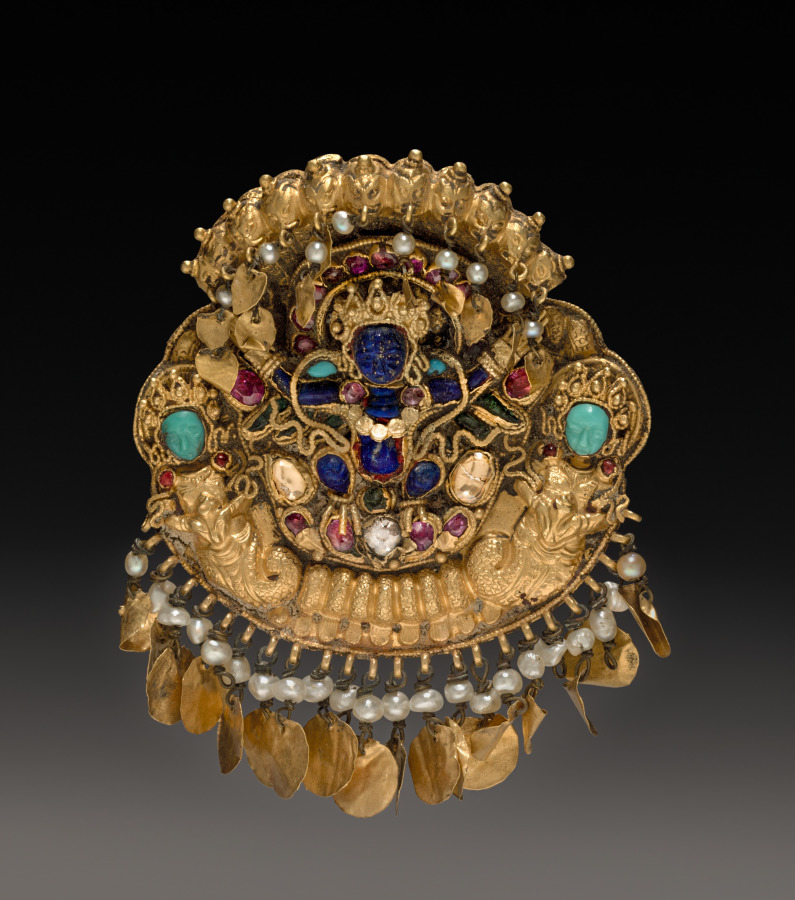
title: Pendant with Two-Armed Blue Deity on a Lotus with Nagas (serpent divinities)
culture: Nepal, Kathmandu Valley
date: 1600s or 1700s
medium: gold with lapis lazuli and turquoise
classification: Jewelry